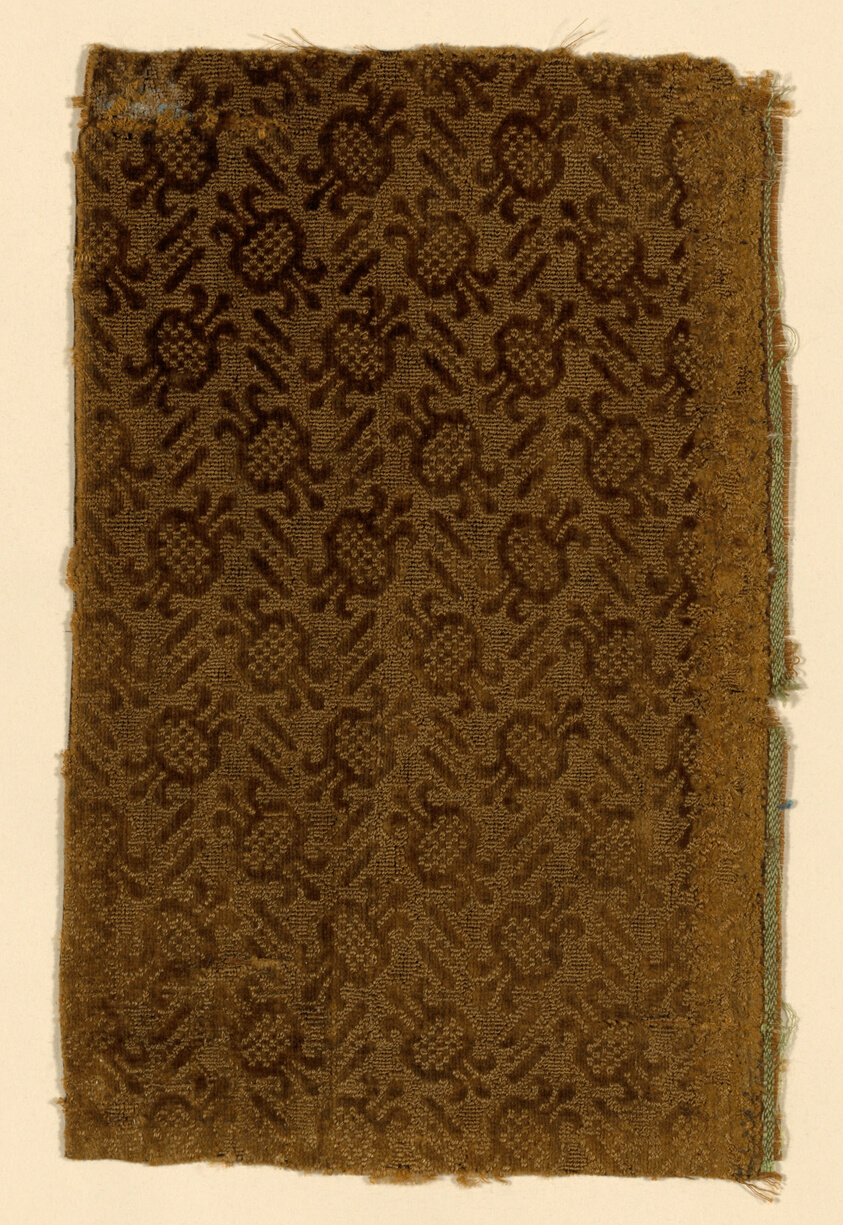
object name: Textile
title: Fragment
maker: Italy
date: 1601/25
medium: Silk, cut, uncut velvet against twill weave foundation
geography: Italy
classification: textile; weaving - velvet